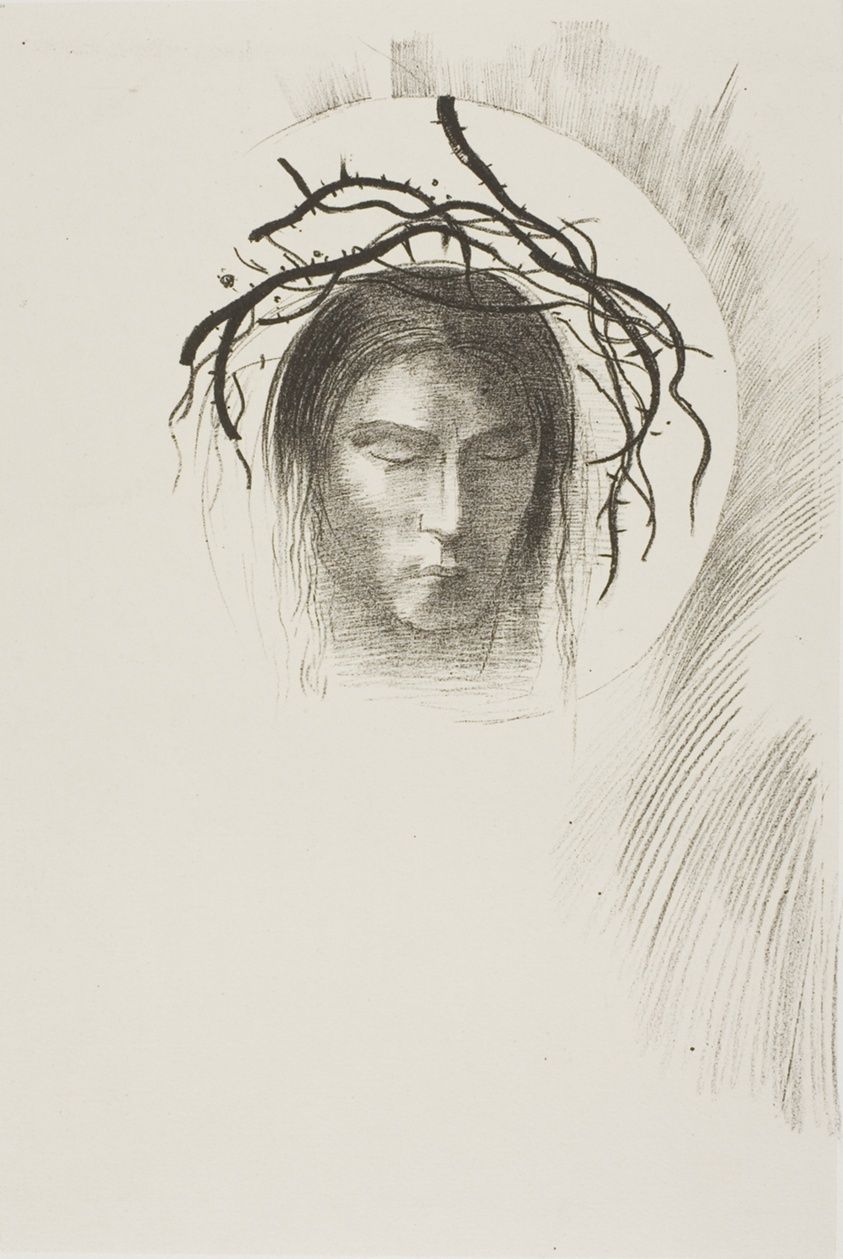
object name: Print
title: Day Appears at Last,...and in the Very Disk of the Sun Shines the Face of Jesus Christ, plate 24 of 24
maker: Odilon Redon (French, 1840-1916)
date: 1896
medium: Lithograph in black on cream China paper laid down on ivory wove paper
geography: France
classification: lithograph; print; prints and drawing; paper